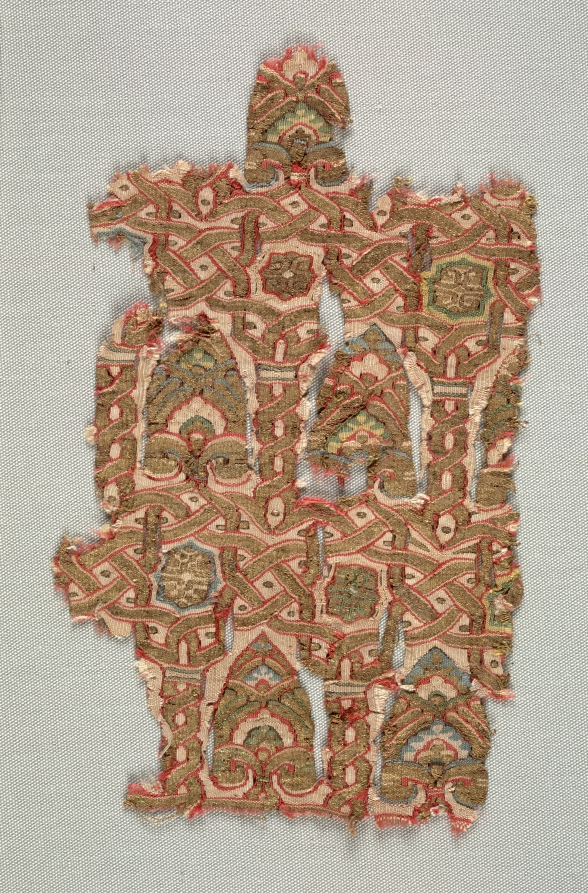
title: Fragment with arcade and palmettes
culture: Spain, probably Granada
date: 1200s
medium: Silk and gold thread: tapestry weave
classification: Textile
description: Although geometric patterns were fashionable in all media throughout the Islamic world, examples in textiles are the most abundant from Islamic Spain. In this fragment, gold-thread strapwork interlaces to form stars above columns that frame colorful palmette leaves in a fine tapestry weave.